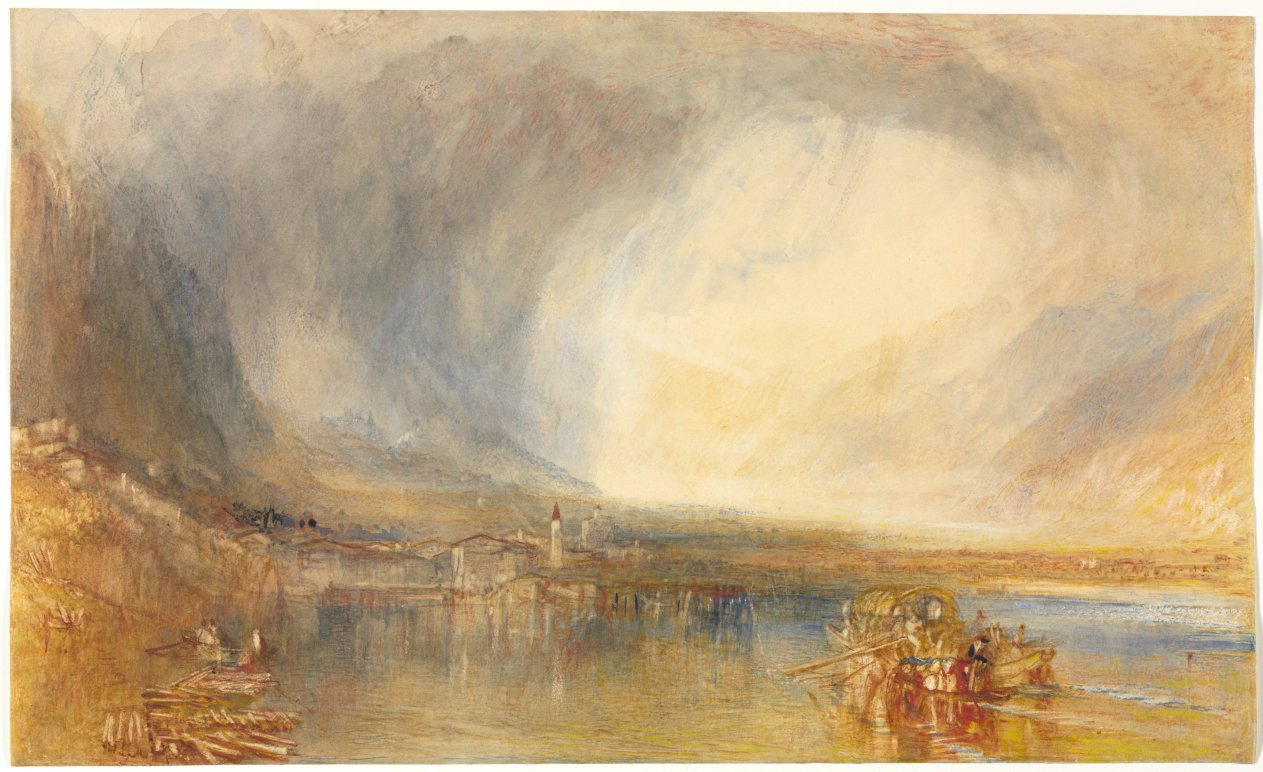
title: Flüelen, from the Lake of Lucerne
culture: England, 19th century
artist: Joseph Mallord William Turner (British, 1775–1851)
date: 1845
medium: watercolor with gouache and scratch-away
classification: Drawing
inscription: MFA Boston label on verso: "Special Loan Exh. Turner, Constable and Bonington, lent by Wedgewood"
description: In this watercolor, created late in his life, J.M.W. Turner depicted the small Swiss town of Flüelen and its shimmering reflection out of violet-colored mist. The work belongs to a group of highly finished works that the artist created during several summer trips to Switzerland between 1841 and 1845. The swirling vortex of light underscores the grandeur of nature, while the inclusion of figures going about their daily lives within the vastness of the Alps is a reminder of the reality of the scene. At the time he painted this view, Turner was considered the great master of Romantic landscape painting in England.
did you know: The art critic John Ruskin described the series of watercolors to which this work belongs as "sunset drawings," referring to to the fact that they were made at the end of Turner's career rather than their subject matter.